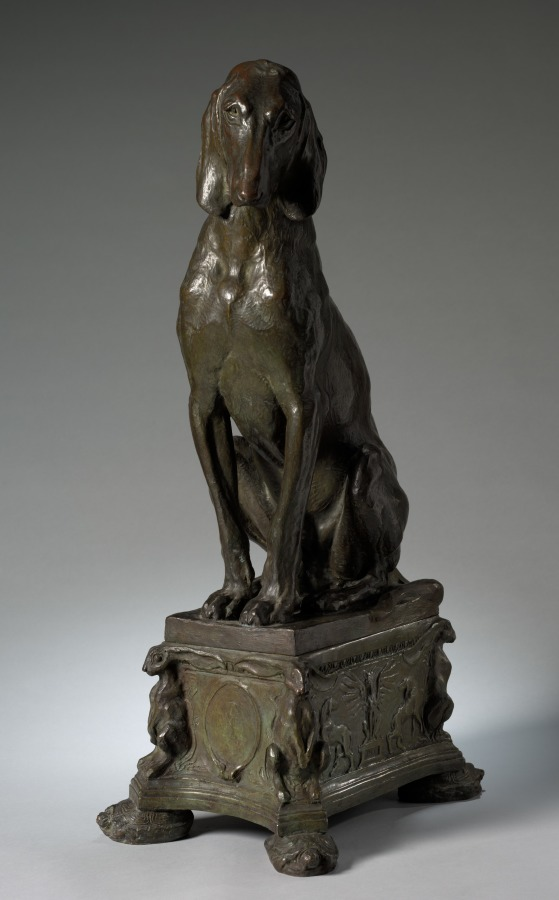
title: Hound (2 of 2)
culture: America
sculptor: Charles Cary Rumsey (American, 1879–1922)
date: 1912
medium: bronze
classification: Sculpture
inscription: Signed on plinth: © C. C. Rumsey